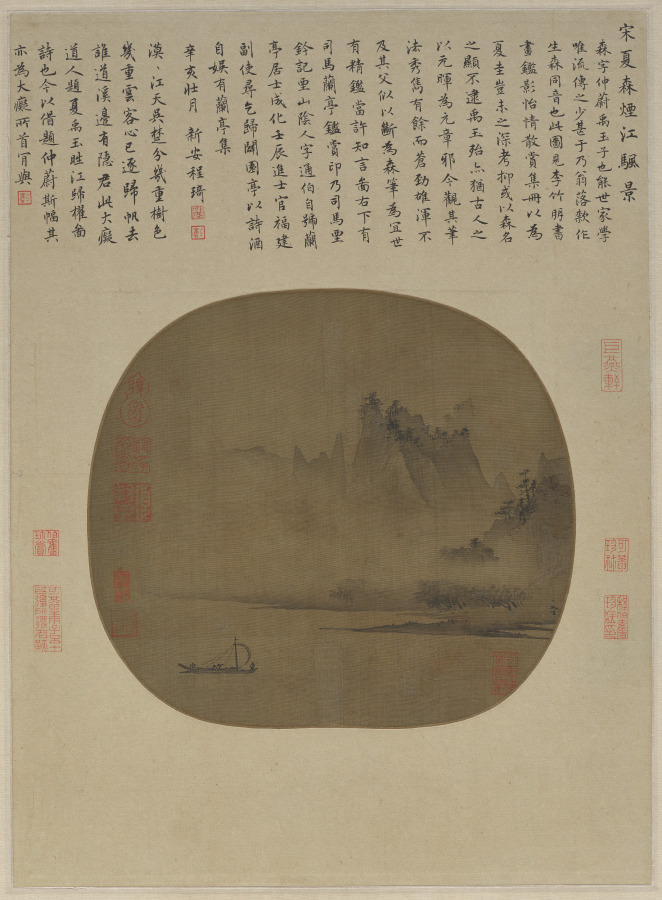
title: Full Sail on the Misty River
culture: China, Southern Song dynasty (1127-1279)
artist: assisted by Xia Sheng (Chinese, active 1200s)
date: 1200s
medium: Fan painting; ink on silk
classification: Painting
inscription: Artist's signature: Xia Sheng 夏生